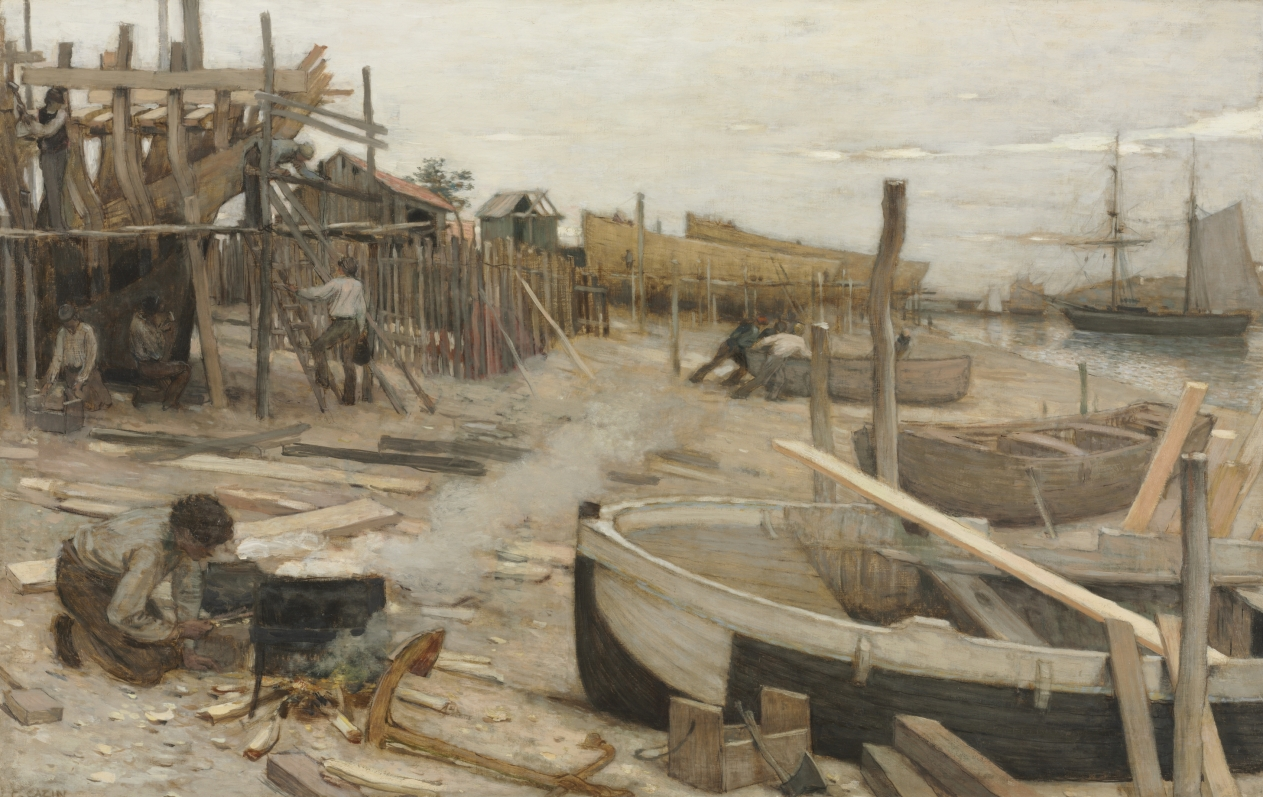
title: The Boatyard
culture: France, 19th century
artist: Jean-Charles Cazin (French, 1841–1901)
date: c. 1875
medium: oil on fabric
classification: Painting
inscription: Signed lower left: c. cazin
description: Cazin exhibited this painting at the Paris Salon of 1876, marking the start of his official career. It depicts a boatyard in the artist's native Boulogne, a port city on the English Channel. The young man in the foreground is melting tar at a smoky fire, while men work on a boat just above him. Cazin was associated with the Realist movement during his early years and later with the Impressionists.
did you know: This painting was submitted to the Paris Salon in 1876 as Cazin’s first major work.